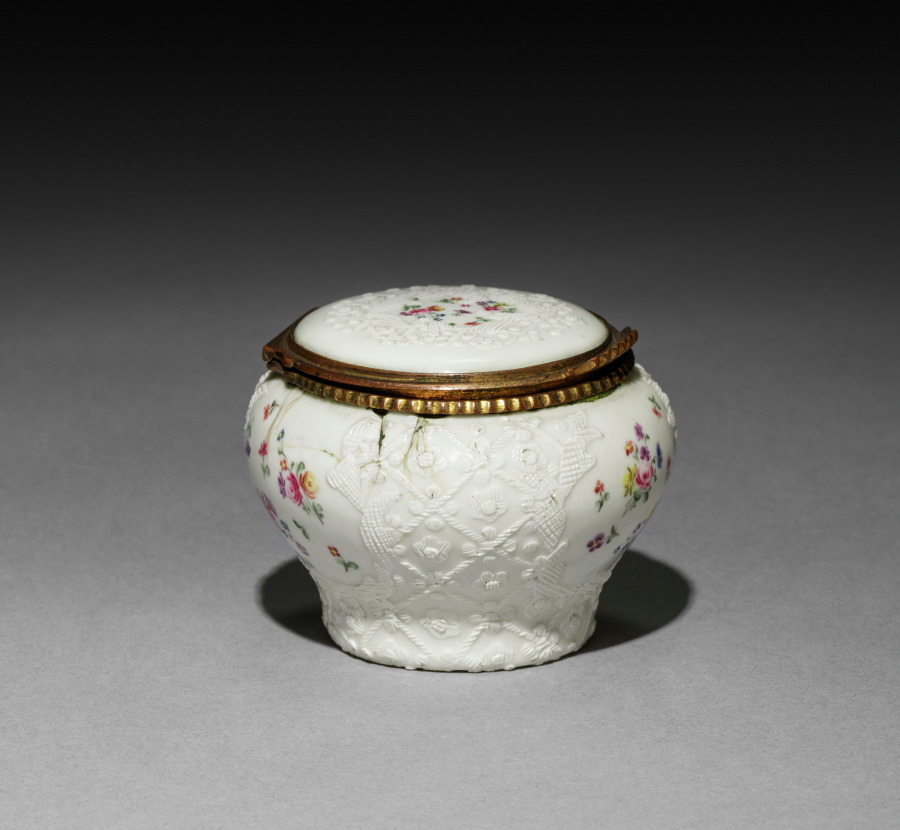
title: Box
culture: England, Staffordshire, 18th century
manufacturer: South Staffordshire Factory (British)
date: c. 1770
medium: enamel on copper with metal mounts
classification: Miscellaneous